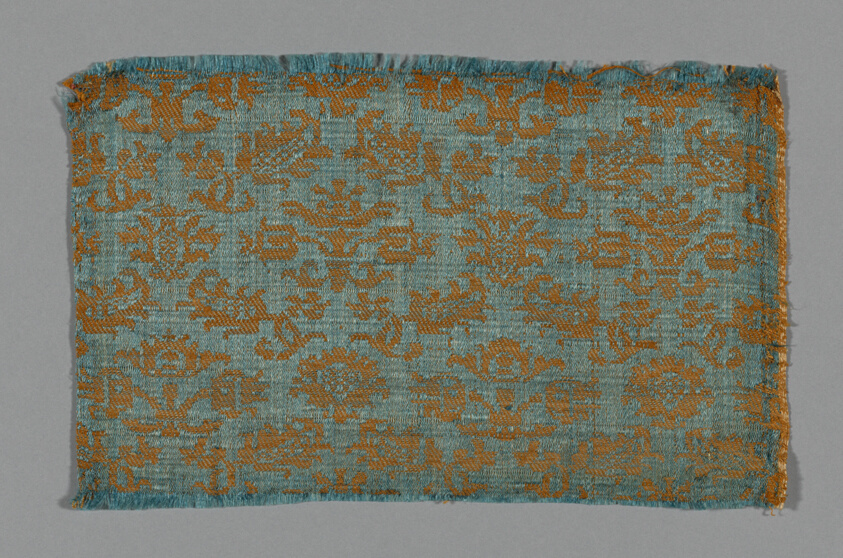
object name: Textile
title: Fragment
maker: Italy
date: 1625/50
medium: silk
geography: Italy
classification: textile; weaving